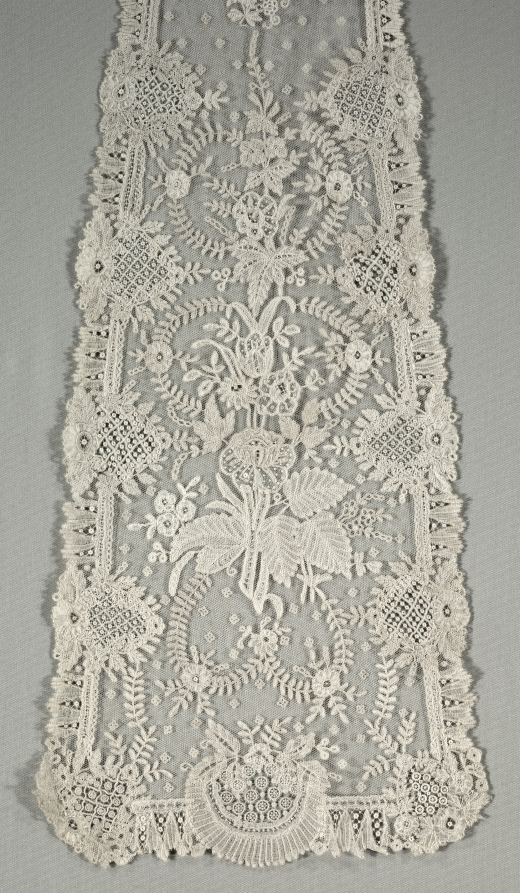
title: Fichu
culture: France or Belgium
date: c. 1875–80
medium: Composite lace. Machine-made netting (reseau), Brussels bobbin lace and French needle point lace; linen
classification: Lace